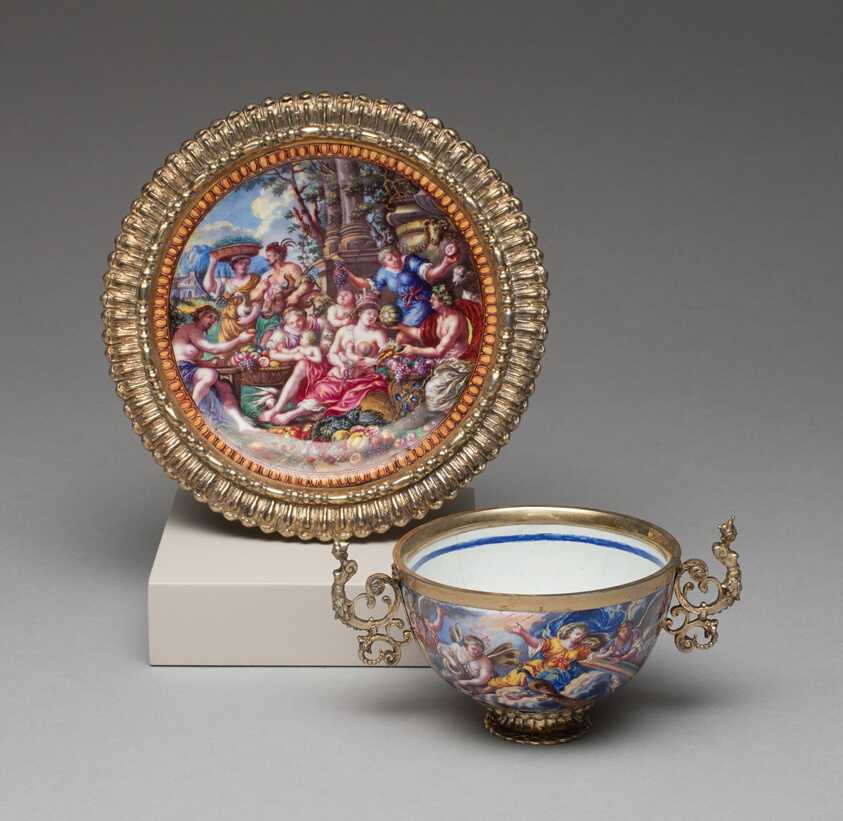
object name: Metalwork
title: Tea Bowl and Saucer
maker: Matthäus Baur II; German, active 1681–1728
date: c. 1700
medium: Silver-gilt, cast, embossed, and chased and enamels on copper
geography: Augsburg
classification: drinking vessel; silver; metalwork; european decorative arts